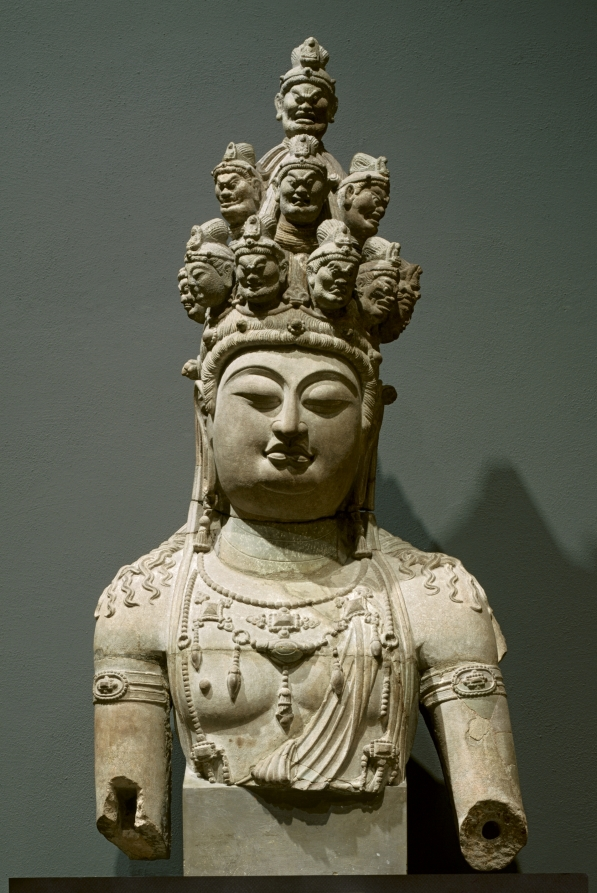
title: Eleven-Headed Guanyin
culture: China, Tang dynasty (618-907)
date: early 700s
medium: gray sandstone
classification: Sculpture